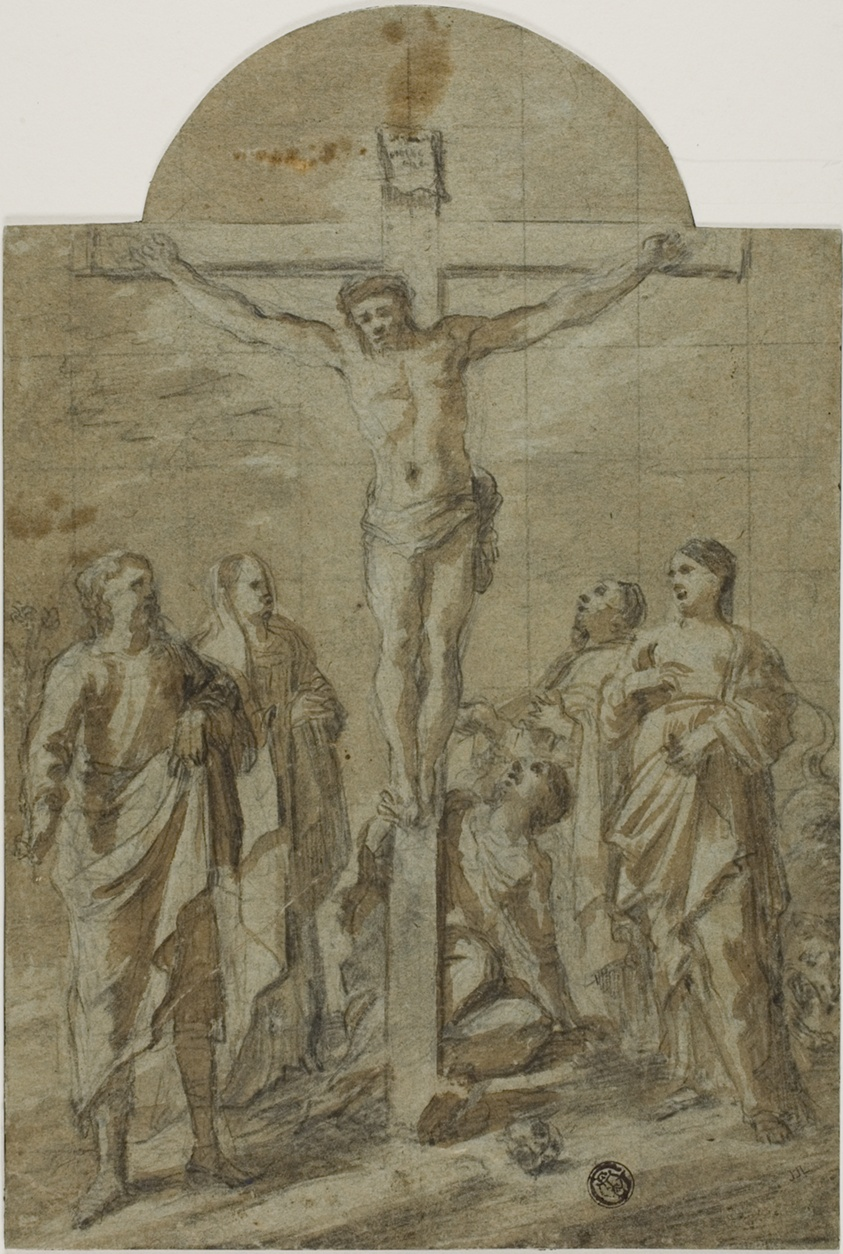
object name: Drawing and Watercolor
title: Crucifixion with Saints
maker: Unknown Artist; French, 17th/18th century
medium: Black chalk, with brush and brown wash, on lunette-shaped blue laid paper (discolored to grayish-green), squared in graphite, laid down on cream laid paper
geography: France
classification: ink or chalk wash; drawings (visual works); prints and drawing